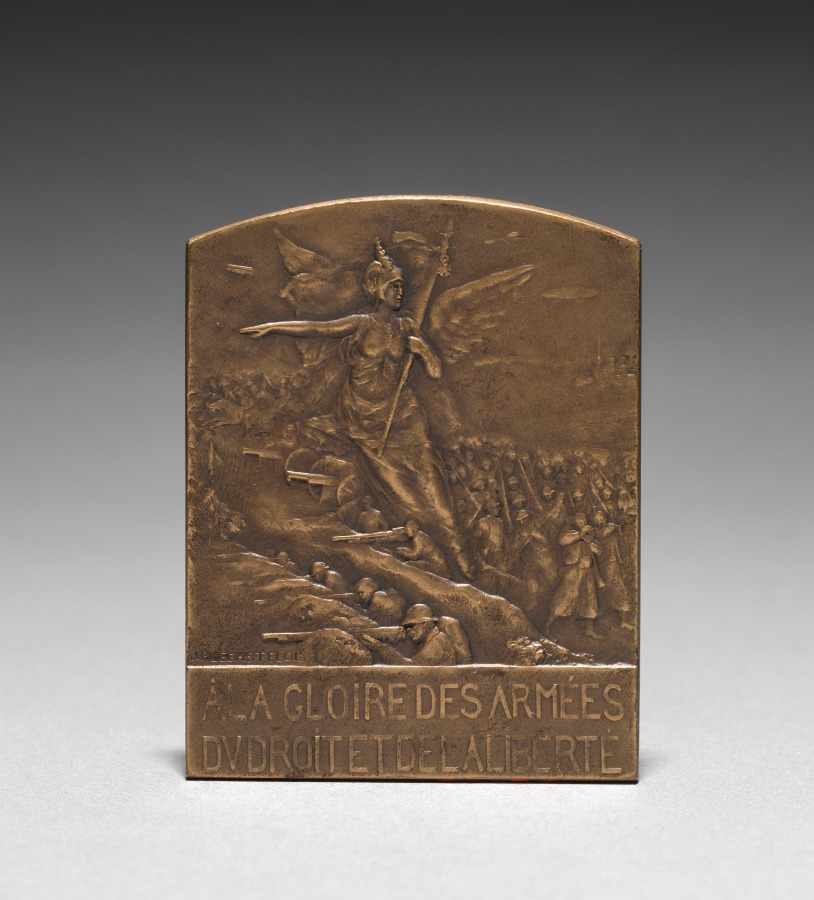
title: Medallion (obverse)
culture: France, 19th-20th century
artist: Jules Prosper Legastelois (French, 1855–1931)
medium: bronze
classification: Metalwork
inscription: "À la gloire des armées du droit et de la liberté."